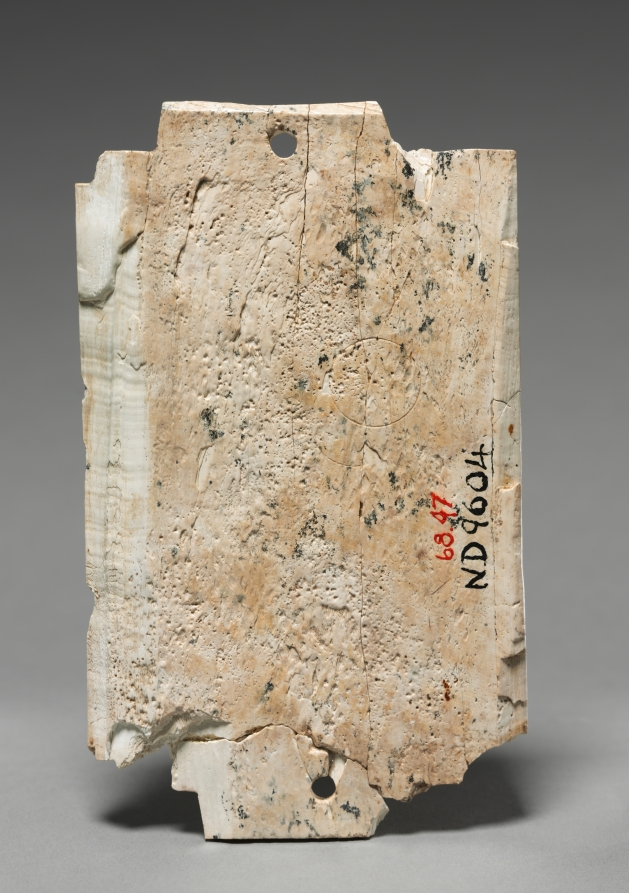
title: Decorative Plaque: Ram-Headed Sphinxes Flanking a Sacred Tree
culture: Phoenicia, Iraq, Nimrud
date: 900–800 BCE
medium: ivory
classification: Ivory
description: This small plaque was executed in the Phoenician style with symmetrical compositions, elongated figural proportions, and Egyptian subjects and motifs. Examples have been found throughout the Middle East, but thousands come from Nimrud where most were excavated in the storerooms of a military arsenal built by King Shalmaneser II (858-824 bc). When the Nimrud palace was sacked in the 7th century bc, these ivories were thrown into a well, where Sir Max Mallowan (the husband of Agatha Christie) discovered them in 1951. The monumental wall relief (1943.246) was found at the same Assyrian palace at Nimrud.